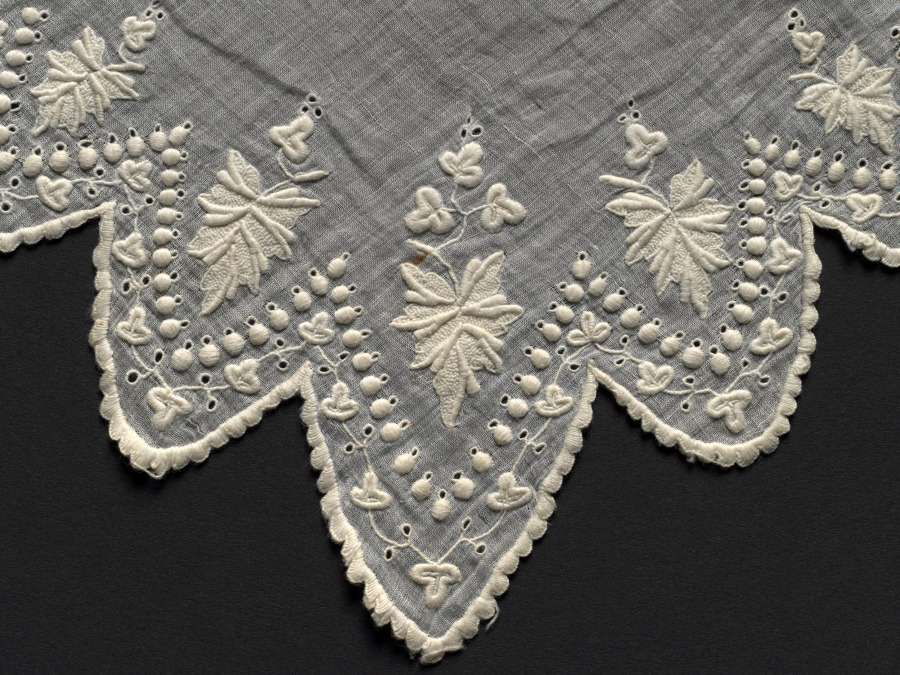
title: Handkerchief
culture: France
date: 1800s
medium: Plain weave linen; cotton embroidery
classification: Embroidery